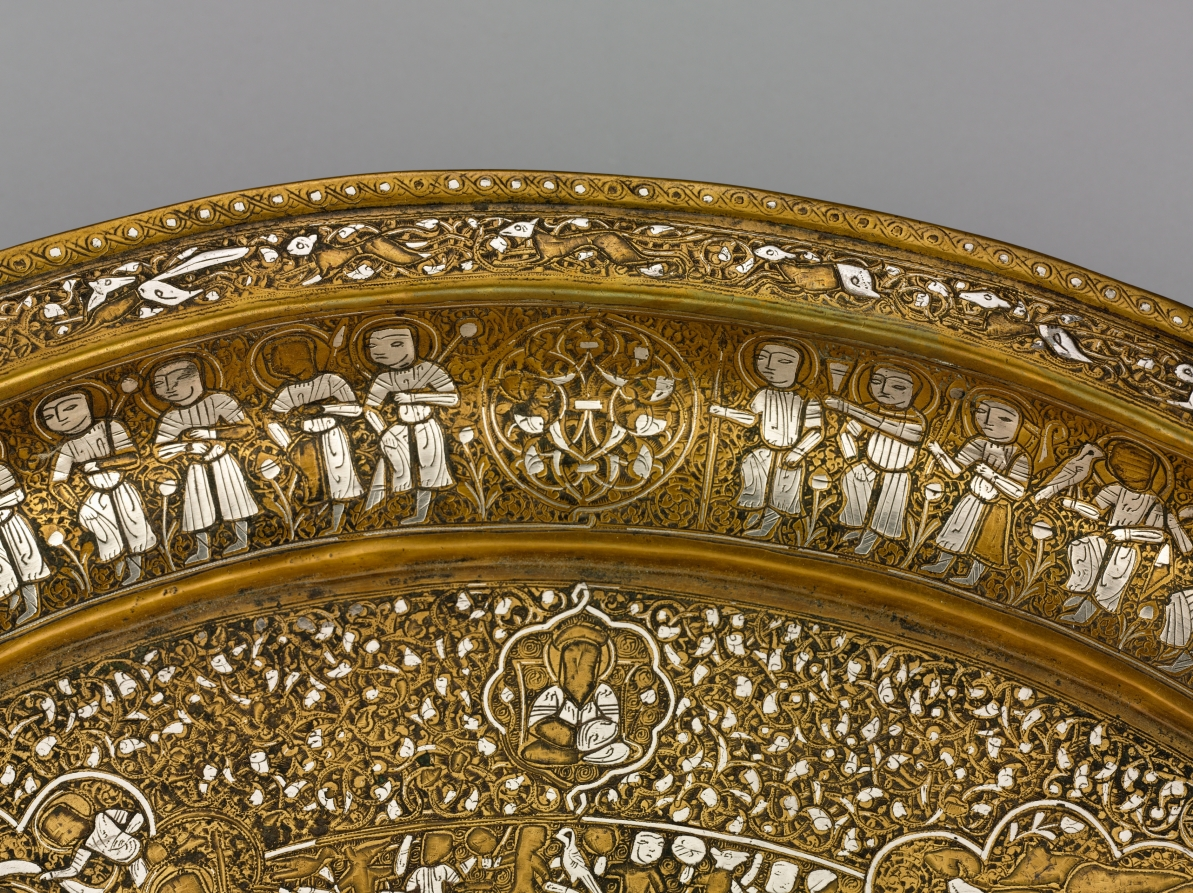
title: Tray Portraying Courtly Pleasures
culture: Syria, Ayyubid period (1171–1260)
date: 1240s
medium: sheet brass inlaid with silver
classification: Metalwork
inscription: The presence of ligatures in the narrow circular bands with interconnected human and animal figures suggests this may be a degenerate form of animated script. It is indecipherable.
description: This tray features images of courtly life interspersed with astronomical symbols. The scenes contained within large multilobed medallions display an enthroned prince with lions at his feet, a banquet, a hunt, dancers, and musicians. Contained within the concentric circles there are also references to solar and lunar motifs, including figures holding sunbursts and lunar crescents. This tray is made of a single sheet of brass and the silver inlay, which is best preserved on the tray’s inner curve, suggests its original brilliance.